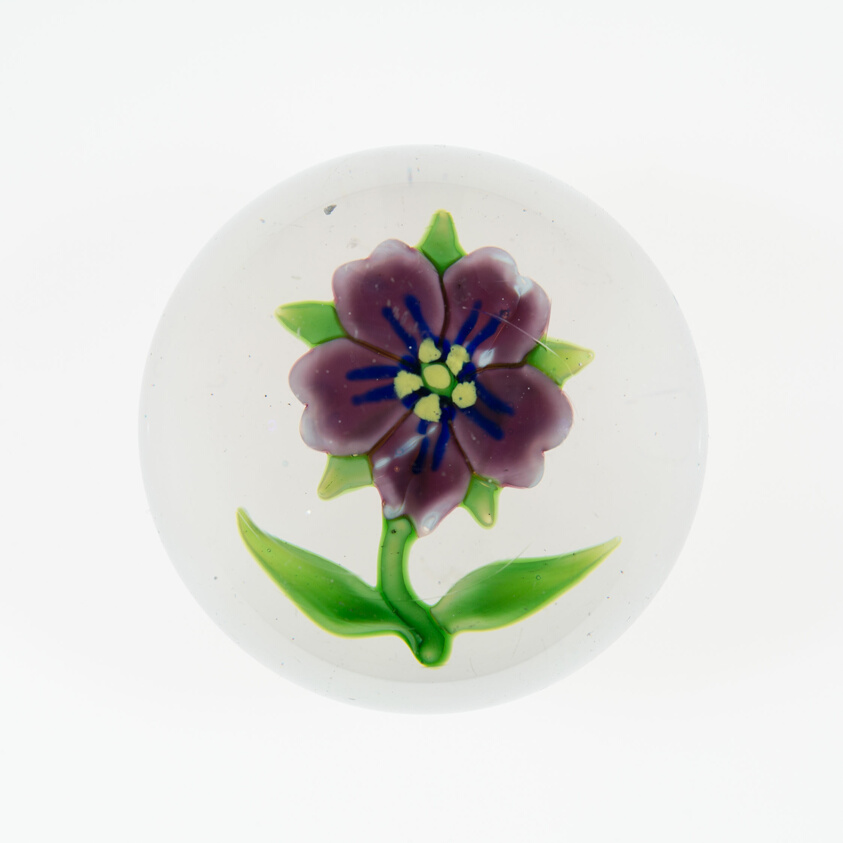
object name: Glass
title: Paperweight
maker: Saint-Louis Glassworks (Cristalleries de Saint-Louis); Lorraine, France, founded 1586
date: 19th century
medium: Glass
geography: Saint-Louis-lès-Bitche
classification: paperweight; glass